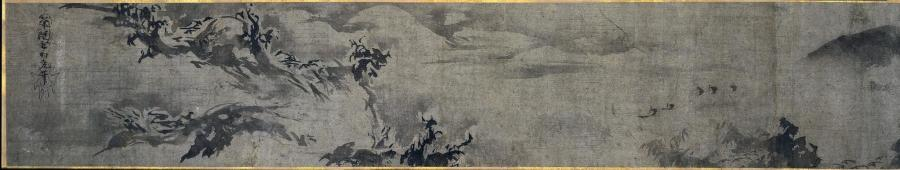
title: Eight Views of Xiao-Xiang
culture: Japan, Muromachi period (1392–1573)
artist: Sesson Shūkei (Japanese, c. 1492–c. 1577)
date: 1500s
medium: handscroll; ink on paper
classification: Painting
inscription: Signature and seal of artist at end of painting.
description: Eight Views of the Xiao and Xiang Rivers can be traced to 11th-century Chinese poems and paintings, the depiction of which had also become popular among Korean and Japanese painters. Xiao-Xiang refers to the region in present-day Hunan province where the Xiao and Xiang rivers converge. Few painters of the Eight Views had in fact seen the scenery; rather, they were trying to portray in ink and wash the lyrical qualities of dim light and a misty atmosphere typical of that region. Each of the poetic titles suggests a time of day, a season, or specific atmospheric conditions—subjects that challenged the abilities of the most talented artists. In this miniature painting (shukuzu) of the Muromachi period, Japanese Zen monk and painter Shukei Sesson depicted all eight views featured in Chinese prototypes: Wild Geese Descending to Sandbar; Returning Sails Off a Distant Coast; Mountain Market in Clearing Mist; River and Sky in Evening Snow; Autumn Moon over Dongting Lake; Night Rain on the Xiao and Xiang; Evening Bell from Mist-Shrouded Temple; and Fishing Village in Evening Glow.